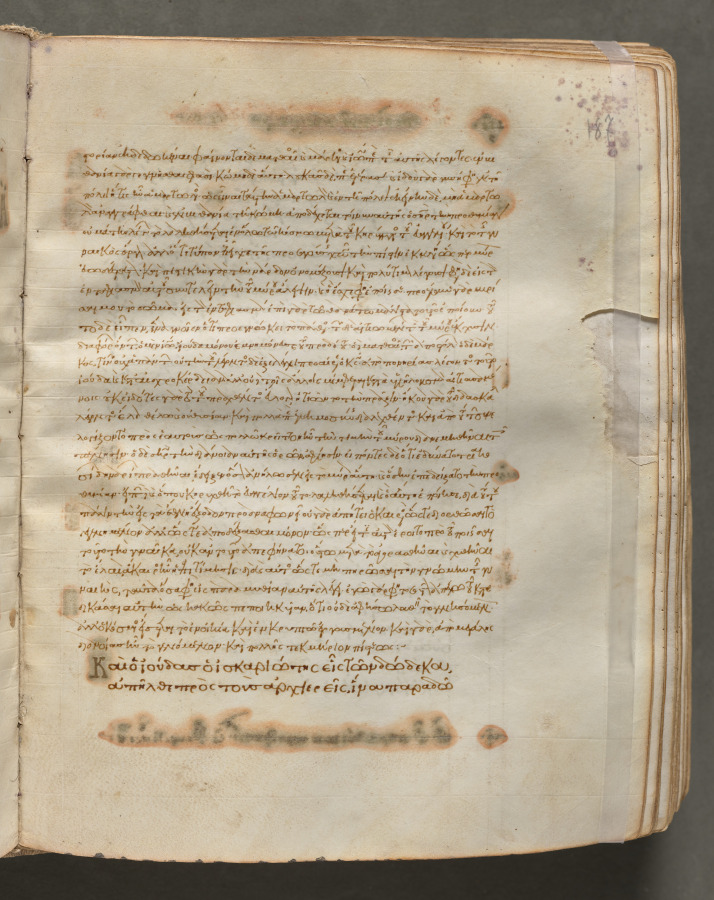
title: Text, folio 187 (recto), from a Gospel Book with Commentaries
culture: Byzantium, Constantinople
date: c. 1000–1100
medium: ink, tempera, and gold on vellum; leather binding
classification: Bound Volume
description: Each of the four gospels in this book opens on a page with brilliantly illuminated borders depicting the author of the text as well as birds-principally peacocks, symbols of the immortality of the soul-and fountains, representing the fountain of life and the salvation of the soul. This volume consists of 428 leaves with texts in Greek. Its level of sophistication suggests that it was probably written and decorated in a monastery in Constantinople.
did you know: Gospel Books were carried in procession through Byzantine churches.